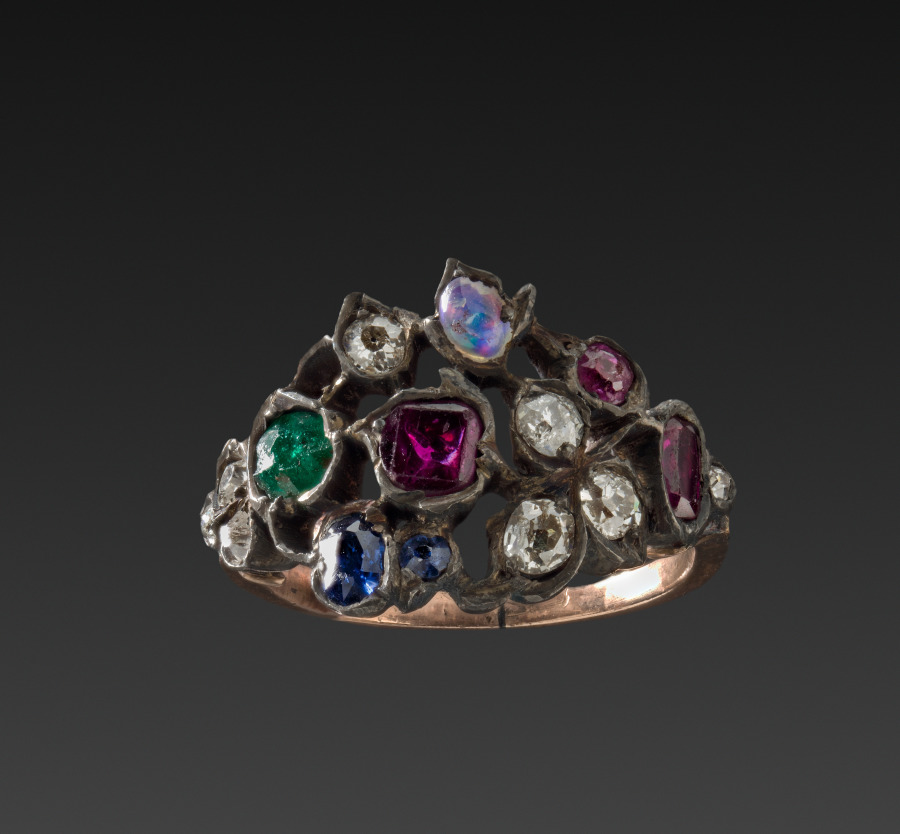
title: Ring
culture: Italy or France, 18th century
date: 1700s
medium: gold band, silver setting with rubies, diamonds, opal, emerald and garnet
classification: Jewelry